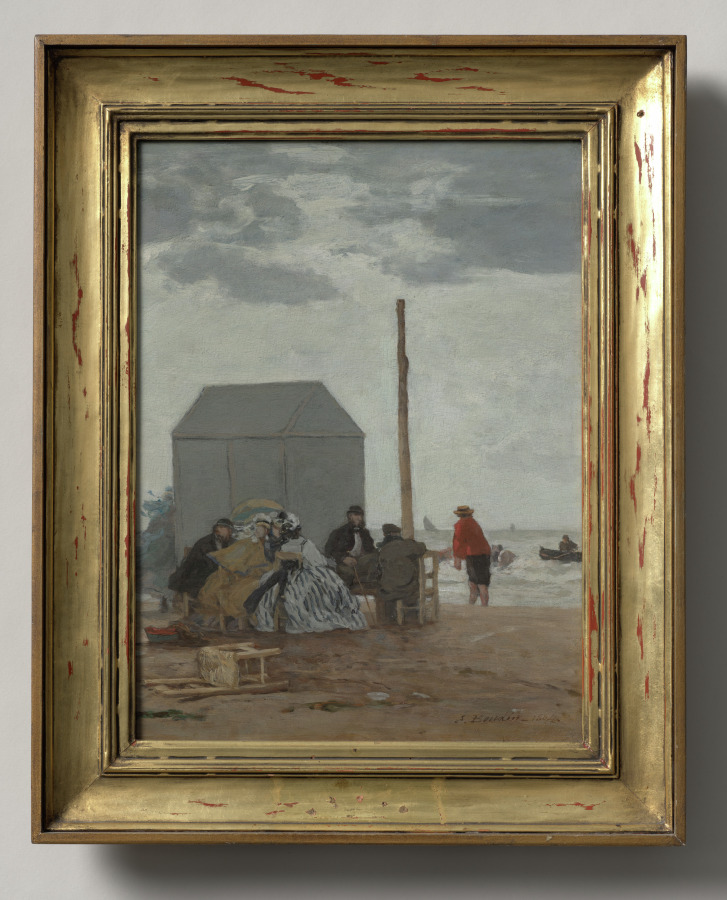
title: The Beach at Deauville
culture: France, 19th century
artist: Eugène Boudin (French, 1824–1898)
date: 1864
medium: oil on wood panel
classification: Painting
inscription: Signed in brown paint lower right corner: E. Boudin 1864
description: During the 1860s, Boudin executed many paintings and watercolors representing well-to-do tourists and vacationers enjoying seaside resorts in Normandy, principally Trouville and Deauville. In this scene, the informally posed figures suggest a sense of relaxation and intimacy. The overturned chair in the foreground underscores the impression of a casually observed moment, as though a sea breeze or a quick departure by its former occupant has upended it. The majority of Boudin's small oil paintings of beach scenes of the 1860s were executed on wood panel. After laying down a thin white ground, Boudin seems to have begun painting directly, not drawing or laying in guidelines for the forms. The result is a freshness and airiness appropriate to a windy day at the beach.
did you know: Boudin evokes the feeling of wind by painting the fluttering blue dress, the beach walker leaning to the left, the whitecaps on the water, and the angle of the sails on the boat in the distance.